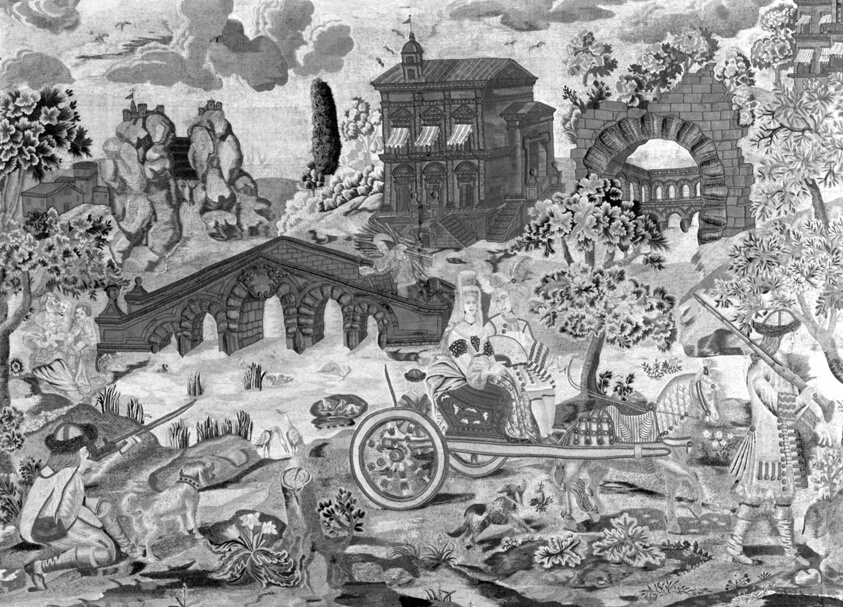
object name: Textile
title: Panel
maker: Portugal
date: 17th century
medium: Silk, satin weave; embroidered in silk, gold, and silver metal thread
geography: Portugal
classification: textile; needlework (visual works)